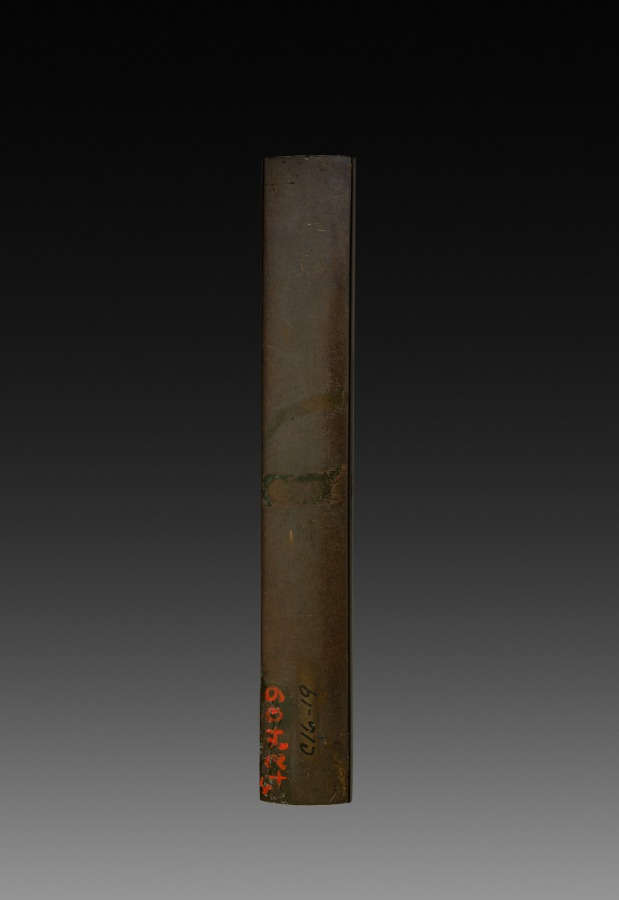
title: Knife Handle (Kozuka)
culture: Japan, Edo period (1615–1868)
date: early to mid-1800s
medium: inlaid bronze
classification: Metalwork